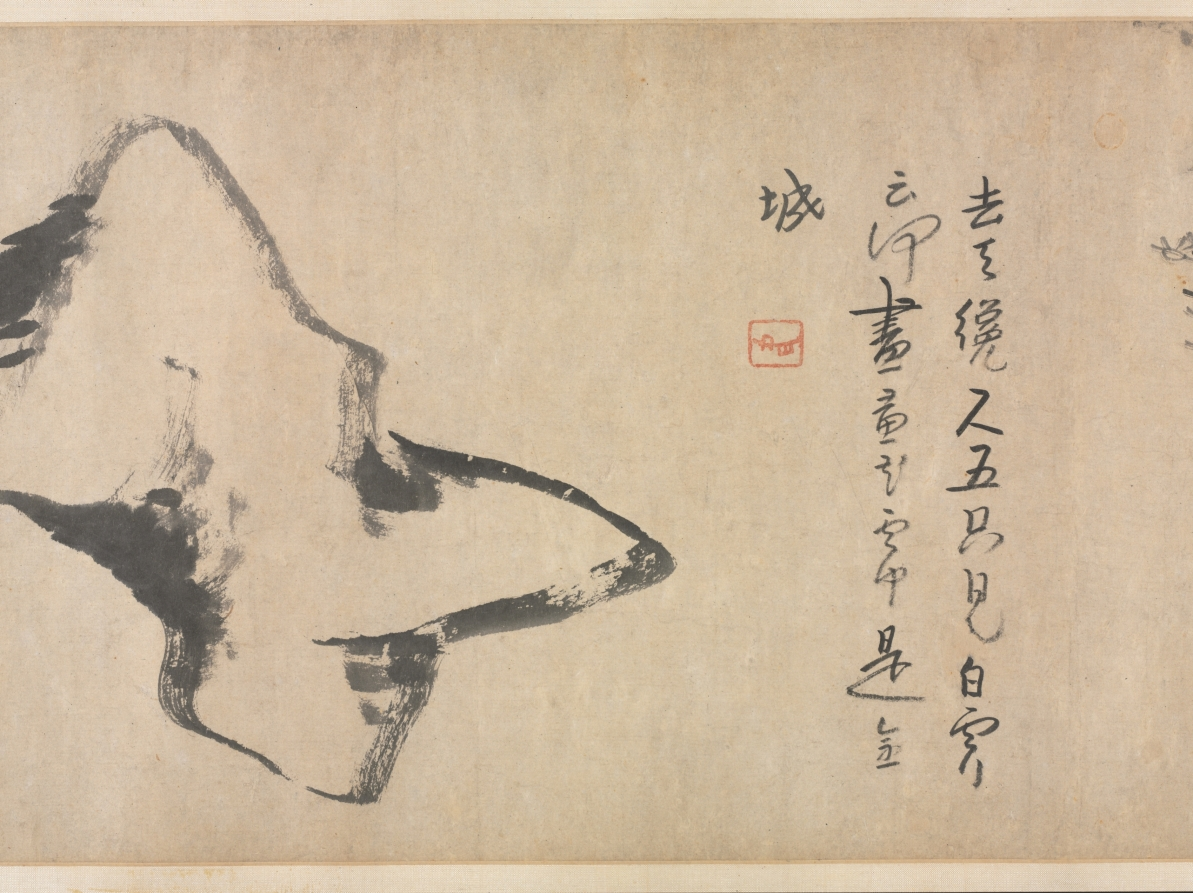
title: Fish and Rocks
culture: China, Qing dynasty (1644-1911)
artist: Bada Shanren (Chinese, 1626–1705)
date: mid- to late 1600s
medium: Handscroll; ink on paper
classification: Painting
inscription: 去天纔尺五，只見白雲行。 云何畫黃花，雲中是金城。 [印] 个山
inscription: 雙井舊中河，明月時延佇。 黃家雙鯉魚，為龍在何處。 [印] 个山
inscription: 三萬六千頃，畢竟有魚行。 到此一黃頰，海潮次上笙。 [印] 个山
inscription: 5 additional seals: 2 of Zhang Daqian 張大千 (1899–1983); 1 of Ta-an Chü-shih; 2 unidentified.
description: Bada Shanren, also called Zhu Da, a 17th-century painter who rejected conventions in favor of an individual, personal expression, is known for his unorthodox compositions of fish, flowers, birds, and rocks. Fish in his paintings are often looking upward toward heaven, swimming in a pond of undefined space. As a member of the Ming imperial family, Zhu Da lost his princely status and hid in a monastery when the Manchus, foreigners from the north, established the Qing dynasty in 1644. This scroll may have some autobiographical meaning, representing fish as leftover subjects (yimin) who lived in a void, having lost their roles in life after the fall of the dynasty.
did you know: After each poem, Bada Shanren used his so-called jixingyin seal 屐形印, which resembles the impression of a shoe on soft mud.